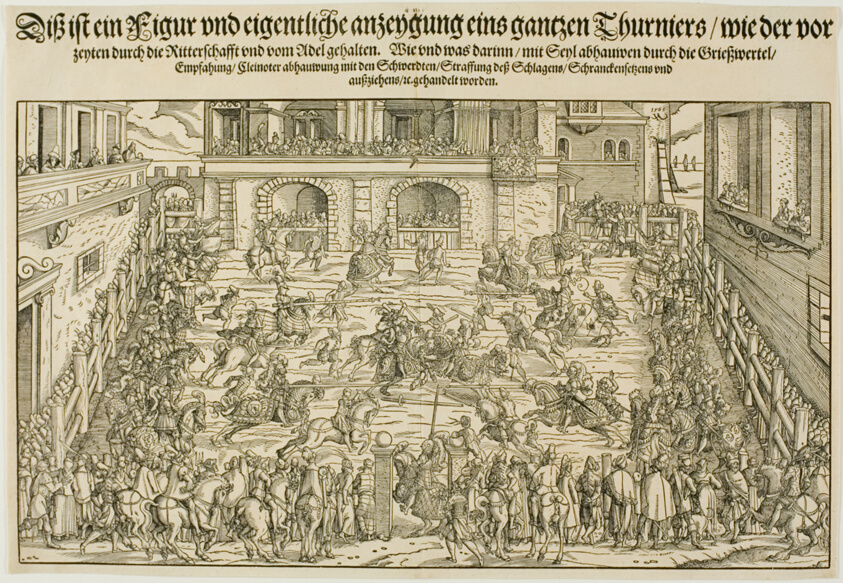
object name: Print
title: The Tournament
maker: Jost Amman (Swiss, 1539-1591)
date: 1565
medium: Woodcut on paper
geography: Switzerland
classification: woodcut; print; prints and drawing